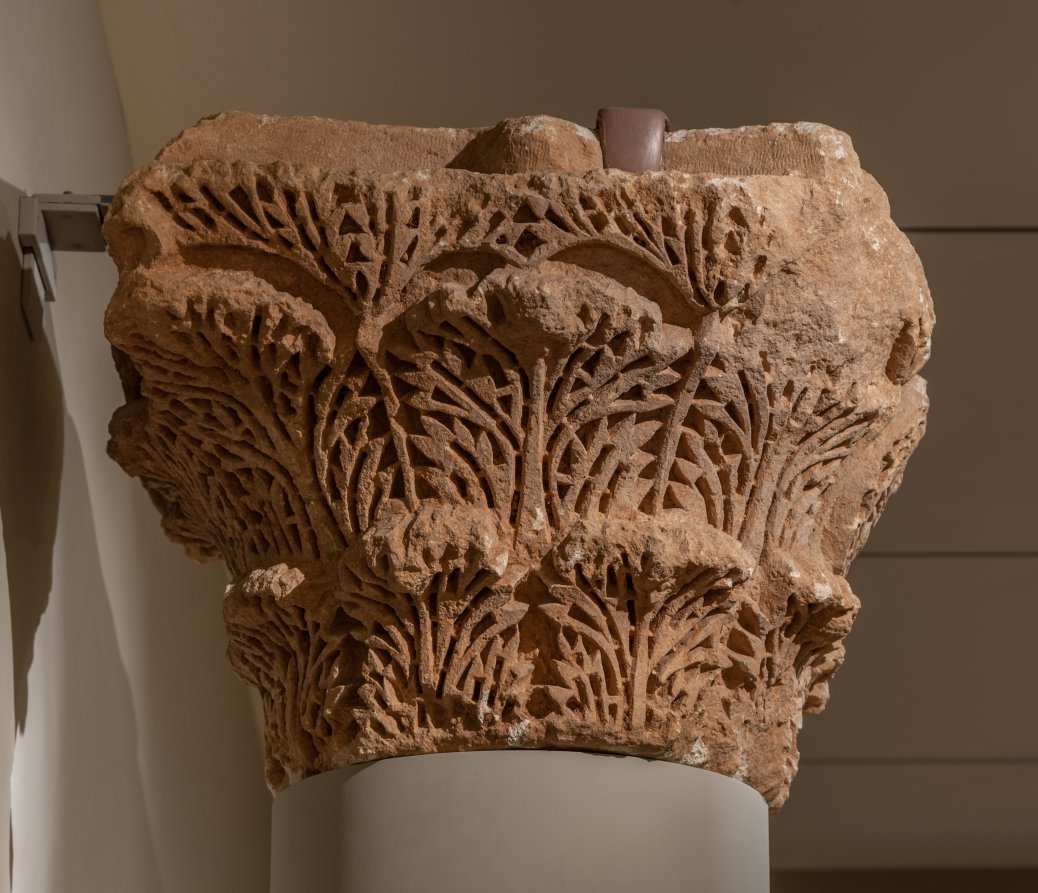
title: Capital with Acanthus and Crosses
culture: Byzantium, Northern Syria, Byzantine period, 5th century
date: 400s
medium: limestone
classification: Sculpture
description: These capitals - the Capital with Acanthus and Crosses and the Engaged Capital with Windblown Acanthus - may have been found in Northern Syria and presumably come from a large and important church. Both capitals are decorated with leaves of acanthus, a fleshy plant with jagged leaves native to the Mediterranean area. One capital is symmetrical with crosses in its ornament, the other is asymmetrical and gives the impression of windblown leaves.